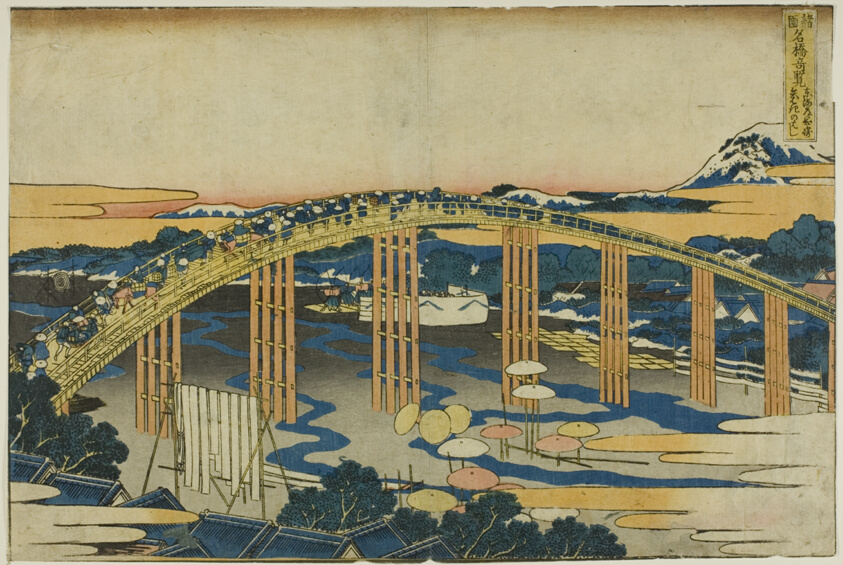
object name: Print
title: Yahagi Bridge at Okazaki on the Tokaido (Tokaido Okazaki Yahagi no hashi), from the series “Unusual Views of Famous Bridges in Various Provinces (Shokoku meikyo kiran)”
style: Japanese (culture or style)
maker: Katsushika Hokusai 葛飾 北斎; Japanese, 1760–1849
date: c. 1833/34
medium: Color woodblock print; oban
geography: Japan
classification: woodblock print; print